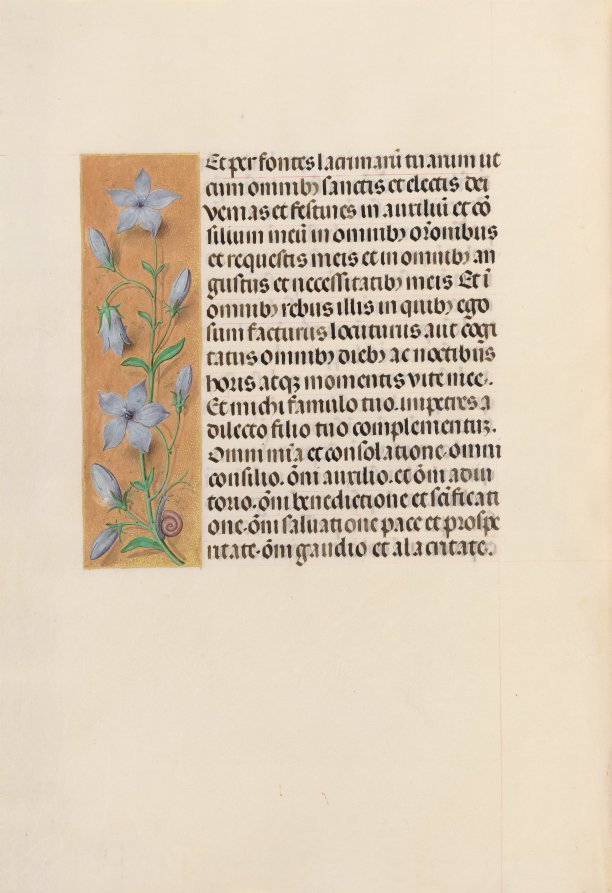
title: Hours of Queen Isabella the Catholic, Queen of Spain: Fol. 259v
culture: Flanders, Ghent and Bruges, late 15th century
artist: Master of the First Prayerbook of Maximillian (Flemish, c. 1444–1519)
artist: and Associates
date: c. 1500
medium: ink, tempera, and gold on vellum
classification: Bound Volume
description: This manuscript was illuminated by a circle of at least five highly organized manuscript painters active in the Flemish cities of Ghent and Bruges. The principal illuminator was Alexander Bening, who painted the majority of the book's miniatures. Manuscripts produced by this circle of artists are renowned for the decoration of their borders, which typically feature a rich variety of realistically-painted flowers, birds, and butterflies. This prayer book, called a book of hours, was intended not for a cleric, but for the private devotions of a lay person-in this case, Isabella the Catholic, Queen of Spain (1451-1504). Isabella's coat of arms embellishes the book's frontispiece. It is unlikely that the book was commissioned by the Queen herself; rather, she probably received it as a diplomatic gift from someone courting her patronage, perhaps Cardinal Francisco Jimenez de Cisneros. A Franciscan friar, Jimenez was dependent upon Isabella for his advancement, first to the post of Queen's confessor in 1492, and then to Archbishop of Toledo in 1495.